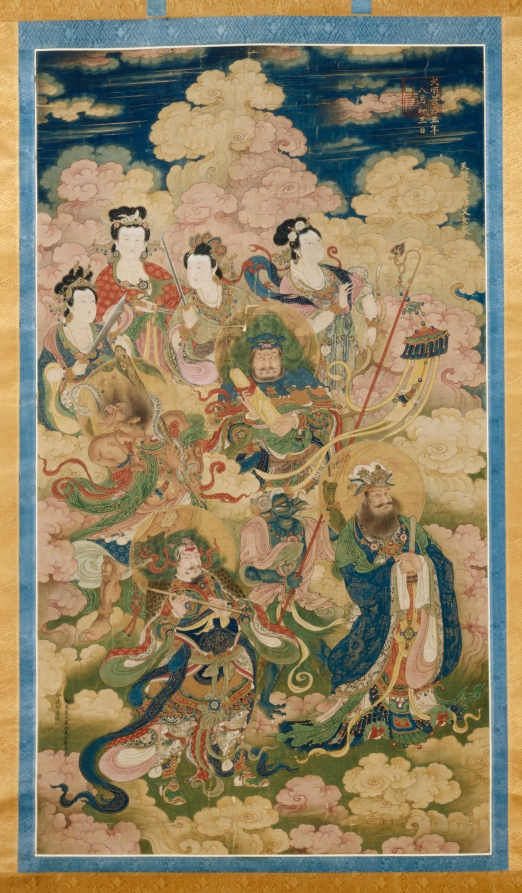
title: The Eight Hosts of Deva, Naga, and Yakshi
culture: China, Ming dynasty (1368–1644)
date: 1454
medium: hanging scroll; ink and color on silk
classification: Painting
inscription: 大明景泰五年八月初三日施 [印] 廣運之寳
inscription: 御用監太監尚義王勤等奉命提督監造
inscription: 天龍八部羅叉女衆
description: The grandest of the Buddhist mortuary rites is the Water-Land (shuilu) ritual. This esoteric ceremony is conducted for the salvation of “all souls of the dead on land and sea.” The ostentatious ritual was performed for imperial ancestors and high officials from the Song (960–1279) to the Ming dynasties and drew large crowds. On the second day of the weeklong ceremony, paintings are hung in the inner altar. This scroll represents the Eight Hosts of Celestial Nagas and Yakshis as described in the Lotus Sutra. Together with CMA 1973.70.1, it belongs to a set of 36 Water-Land ritual paintings that are the finest works of their types known from the Ming period. With their bright, opaque color and fine-line gilt decoration intact and unfaded, both paintings share a remarkable state of preservation.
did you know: The Naga is on the lower right dressed as a king with gold dragons on his blue robe.